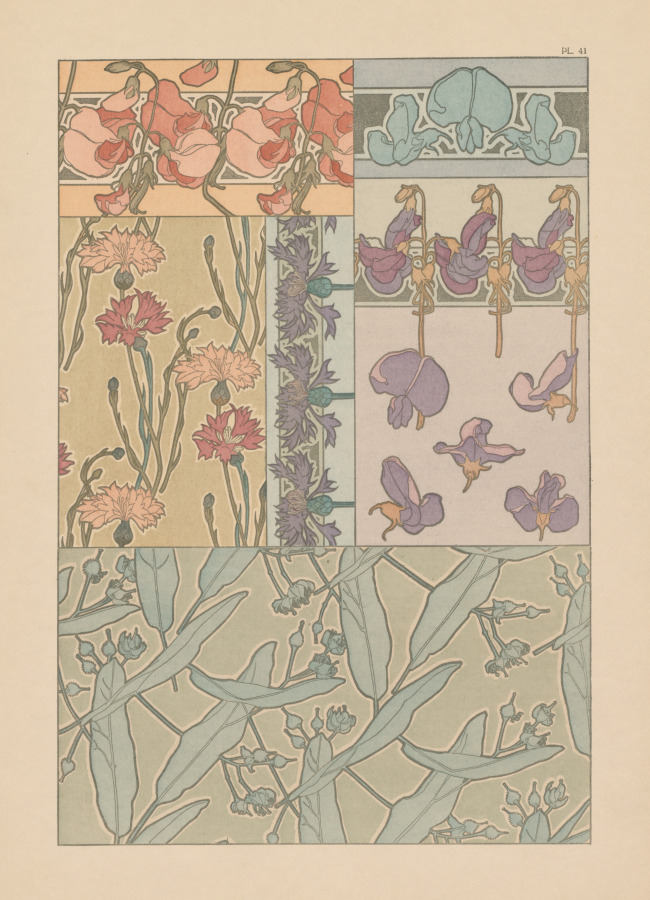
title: Documents Decoratifs: Plate 41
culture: Czechoslovakia, late 19th-early 20th century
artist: Alphonse Mucha (Czech, 1860–1939)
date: 1901–2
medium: lithograph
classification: Print